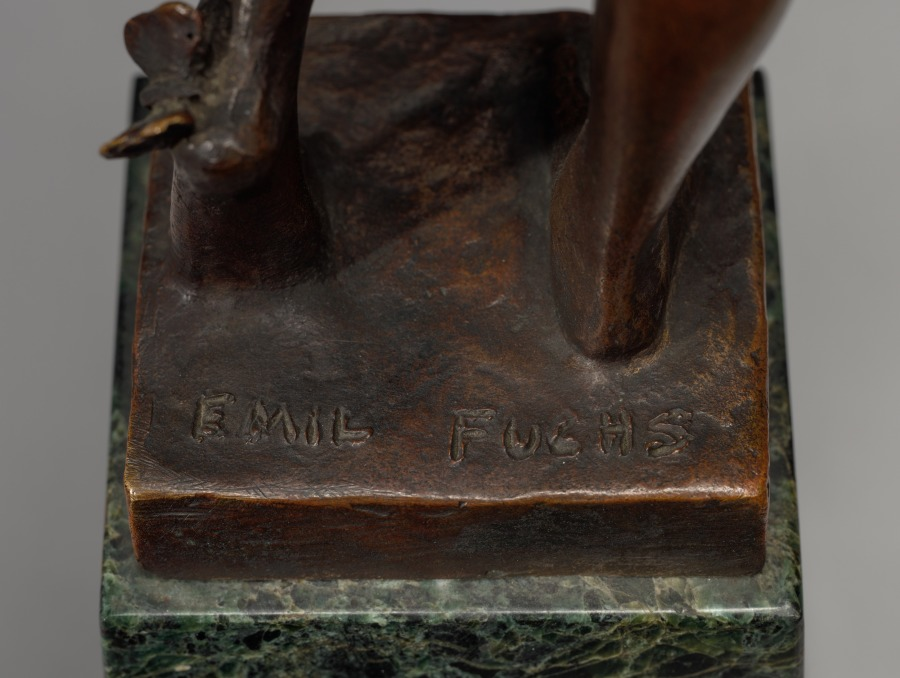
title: Butterfly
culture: America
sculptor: Emil Fuchs (American, born Austria, 1866–1929)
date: c. 1919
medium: bronze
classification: Sculpture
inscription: Signed on base: EMIL FUCHS